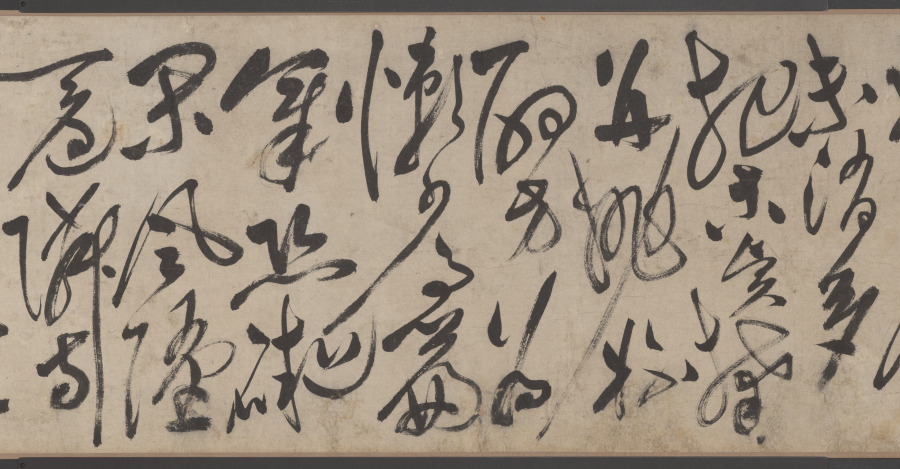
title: Retreat on an Autumn Day, in Cursive Script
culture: China, Ming dynasty (1368–1644)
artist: Zhu Yunming (Chinese, 1460–1527)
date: dated 1523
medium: Handscroll; ink on paper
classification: Calligraphy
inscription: 款識：讌於從一堂，爛漫醉書。癸未（1523）七月晦日也。枝山允明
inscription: 《閒居秋日》逃暑應能蹔閉關，未消多把古賢攀。並拋杯酌方為懶，少事篇章恐礙閑。風墮一庭鄰寺葉，雲開半面隔城山。浮生只說潛居易，隱比求（脫「名」）事更艱。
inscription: 《句曲道中》老至誰憐晝錦明，春來聊得客襟清。宵依星斗宮壇臥，曉（脫「入」）神仙宅舍行。眼看山多城郭少，肩挑詩重簿書輕。何時總入煙霞去。不見人間寵辱驚。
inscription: 《登茆峰》下馬門前一振衣，翠微高迥逼清微。雲端洞裡仙人過，月下山中長史歸。金焰暈牀砂氣伏，紫雲穿竇朮芽肥。神方能詠不能遇，一夜爽靈峰外飛。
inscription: 鈐印：「晞哲」、「允明」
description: This masterwork of calligraphy by Zhu Yunming from Suzhou combines two poems by the artist in cursive script style, characterized by its uninhibited, swift, and intuitive brushwork, so powerful that it here dissolved characters into dots or lines. Written from right to left and top to bottom and alternating in light dry to deep saturated ink, single characters may take a whole column or extend into the next one. Following the movement of the brush, they seem to dance over the paper.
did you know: Zhu Yunming stated that he was in an inebriated state when he created this work.